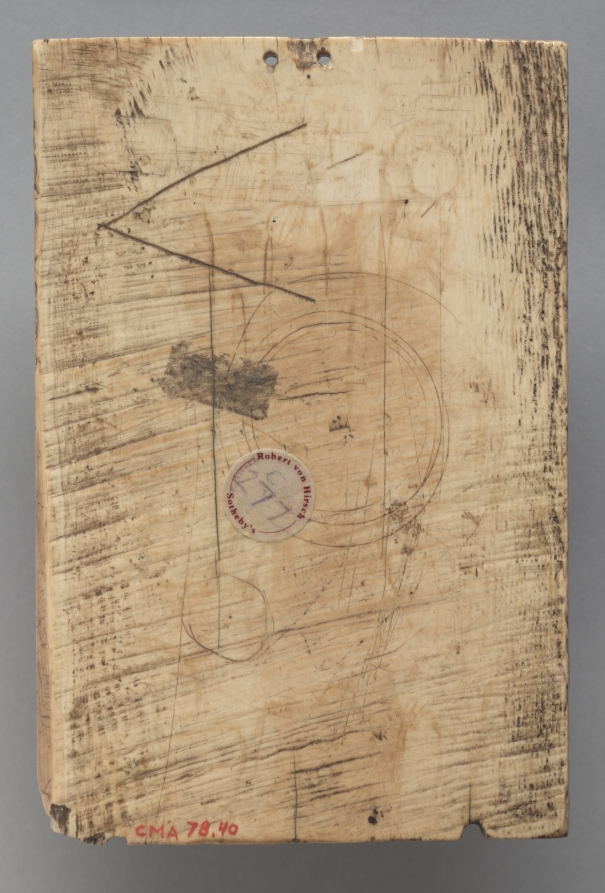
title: Plaque: The Journey to Bethlehem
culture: South Italy, Amalfi, Romanesque period, 12th century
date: c. 1100–1120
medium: ivory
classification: Ivory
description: This ivory plaque depicts Mary, Joseph, and one of his sons from a previous wife on their way to Bethlehem. The scene is set within an architectural frame that combines Byzantine decorative elements (such as the acanthus leaf column capitals) with Islamic architectural motifs (most notably, the distinctively rounded arches). The blending of Byzantine, Islamic, and Western iconographic elements and decorative motifs is typical for the art produced in the city of Amalfi, a prosperous merchant town near Naples in South Italy.